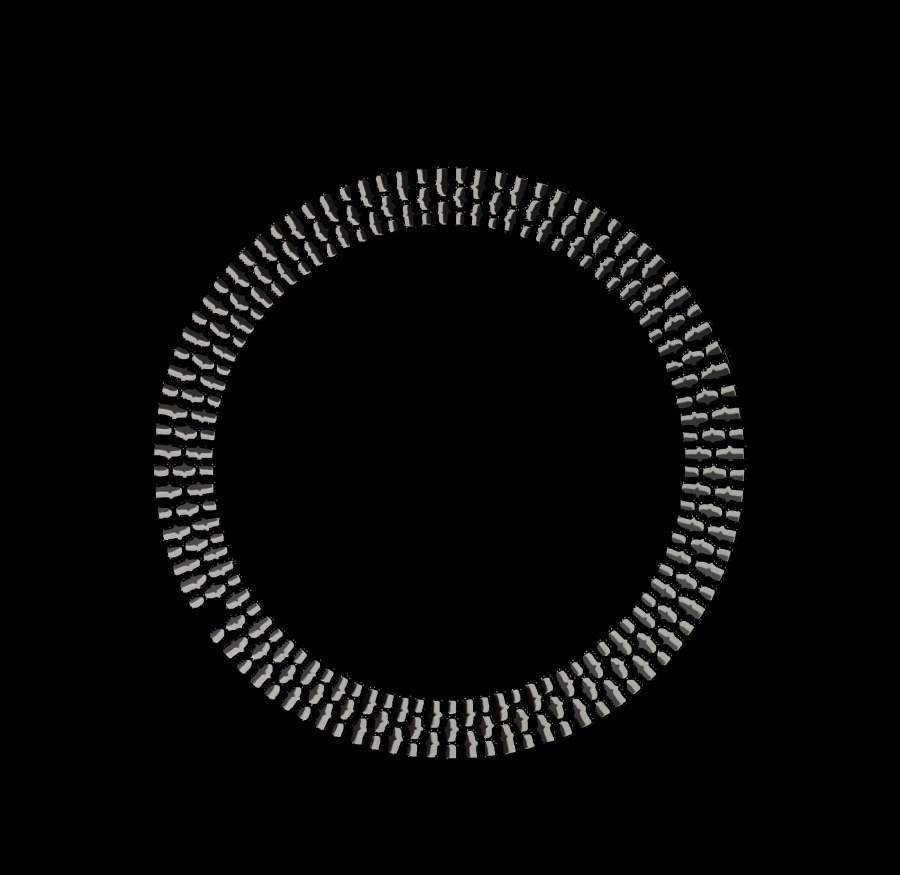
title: Plate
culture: China, Chinese Export, 18th century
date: before 1785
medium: porcelain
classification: Ceramic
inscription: "DUM SISTO VIGILO."